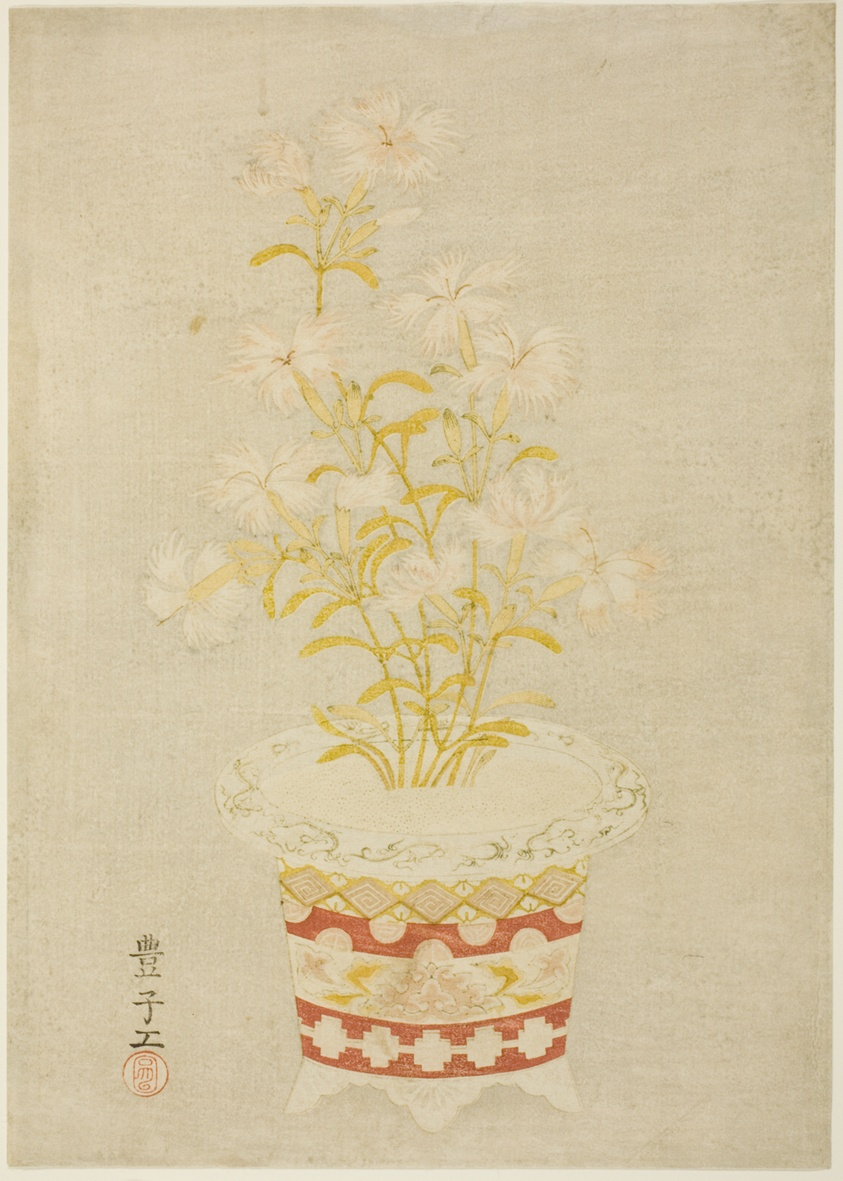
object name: Print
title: Pinks in a Porcelain Pot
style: Japanese (culture or style)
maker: Artist Unknown; Japanese, 18th century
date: c. 1765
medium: Color woodblock print; chuban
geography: Japan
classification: woodblock print; print; asian art